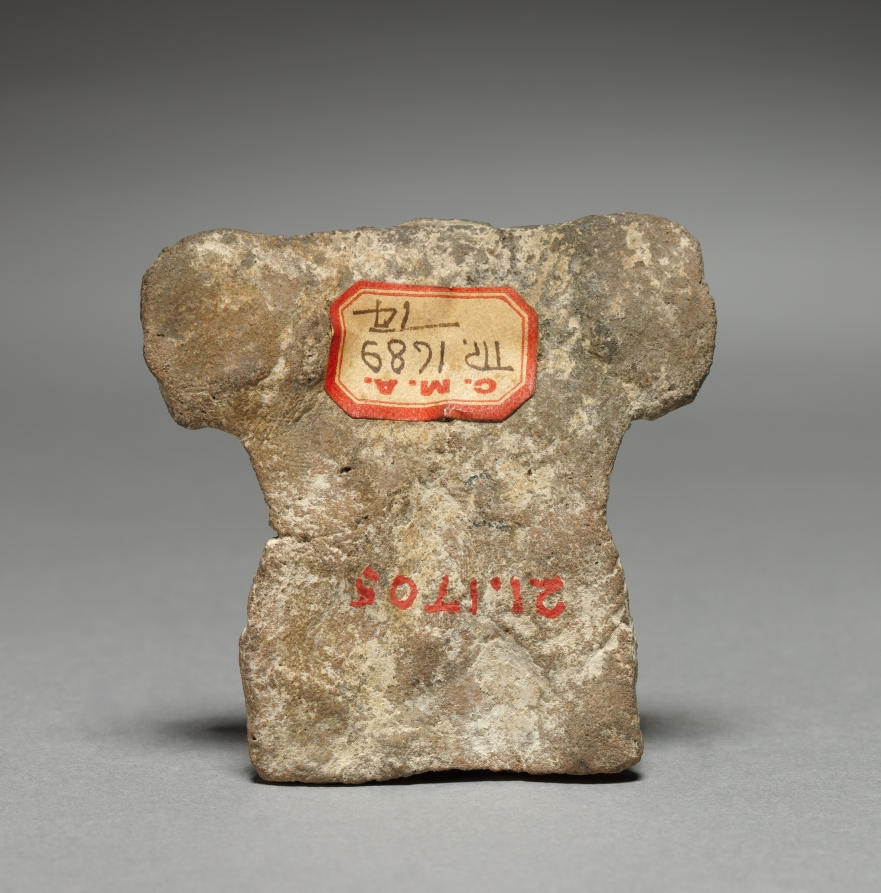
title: Figurine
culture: Mexico, Teotihuacan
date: 1–750 CE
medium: pottery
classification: Ceramic